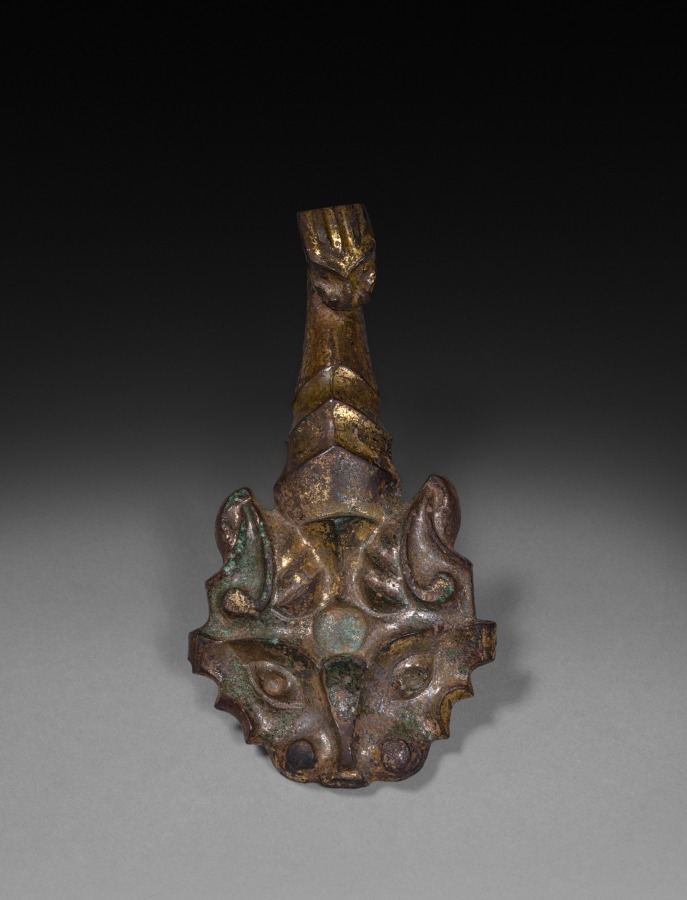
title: Garment Hook (Daigou)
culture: China, Eastern Zhou dynasty (770–256 BCE), Warring States period (475–221 BCE)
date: 475–221 BCE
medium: gilt bronze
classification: Metalwork